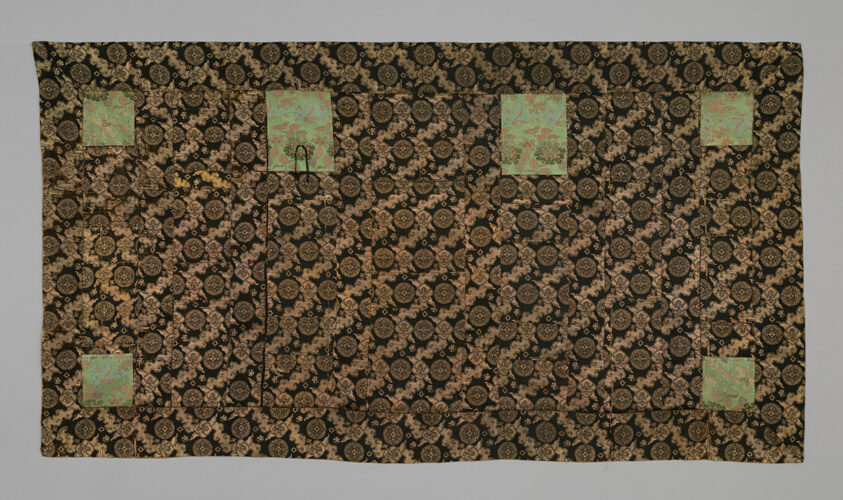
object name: Textile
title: Kesa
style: late edo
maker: Japan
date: late Edo period (1789–1868), 1800/44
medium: Hiri, yô, jô:: silk and gold-leaf-over-lacquered-paper-strip, warp-float faced 3:1 ‘Z’ twill weave with plain interlacings of secondary binding warps and supplementary patterning wefts; shiten and niten: silk and silver-leaf-over-lacquered-paper-strip, warp-float faced 4:1 satin weave with weft-float faced 1:2 ‘Z’ twill interlacings of secondary binding warps and supplementary patterning wefts; lining: silk, plain weave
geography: Japan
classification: textile; weaving; liturgical - buddhist